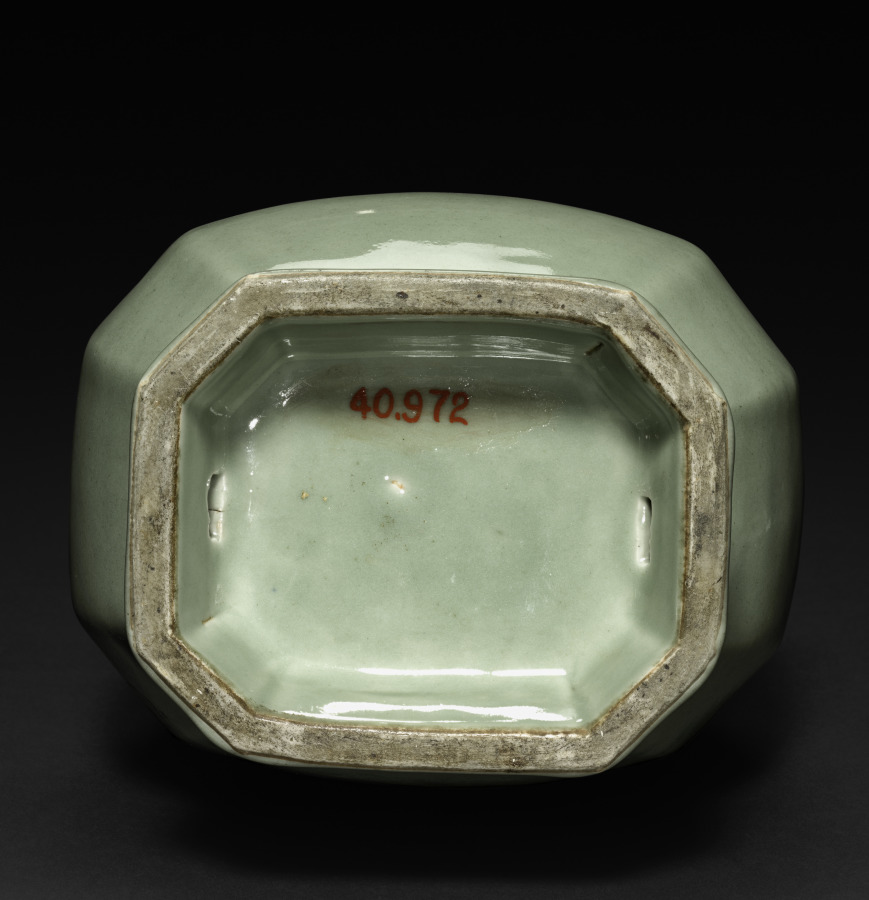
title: Suspension Vase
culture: China, Jiangxi Province, Jingdezhen kilns, Qing dynasty (1644–1911), Yongzheng mark and reign (1722–35)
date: 1723–35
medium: porcelain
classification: Ceramic